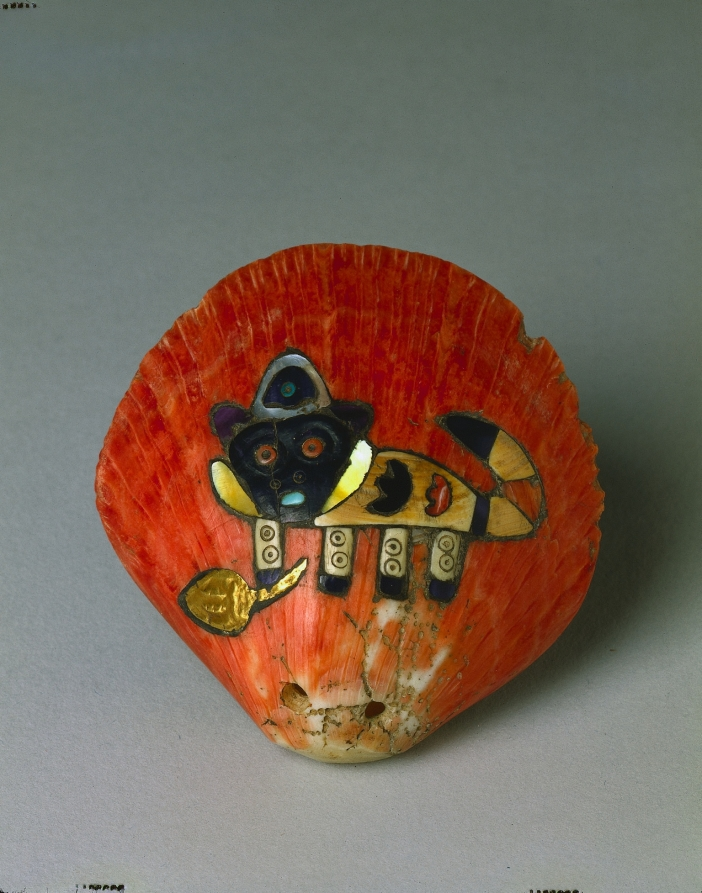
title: Shell with Inlaid Feline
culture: Peru, South Coast, Nasca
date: 100 BCE–700 CE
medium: Spondylus shell with shell, stone, and gold inlay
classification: Jewelry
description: This ornament is made of a spondylus shell, from which the exterior surface has been carved away to reveal a layer of bright orange. The pampas cat inlaid on the surface in multicolored shell and stone has bean-shaped spots on his body, and grasps a gold gourd or fruit. In both Paracas and Nasca art, the small, non-domesticated pampas cat is strongly associated with beans and other crops. Perhaps it was thought to guard the fields from rodents and other pests.